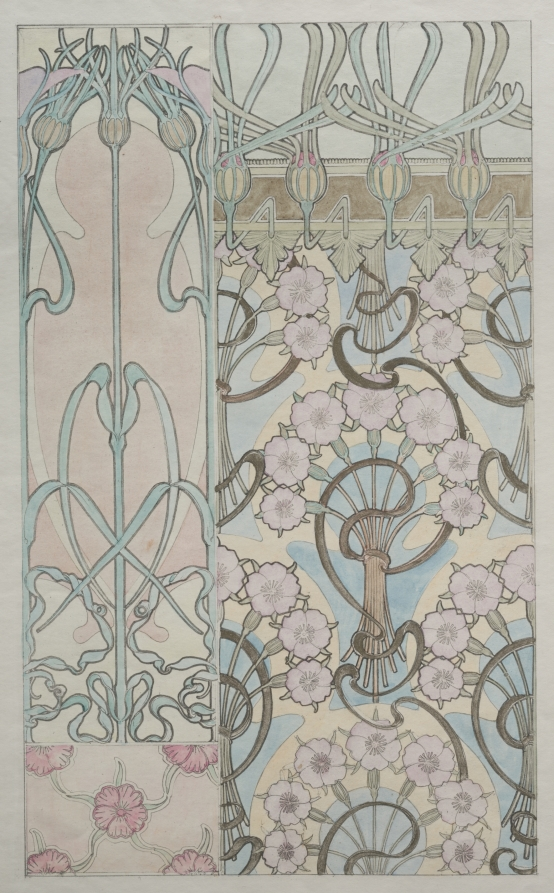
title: Ornament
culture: Czechoslovakia, 20th century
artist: Alphonse Mucha (Czech, 1860–1939)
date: 1901–2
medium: metal relief and watercolor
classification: Print